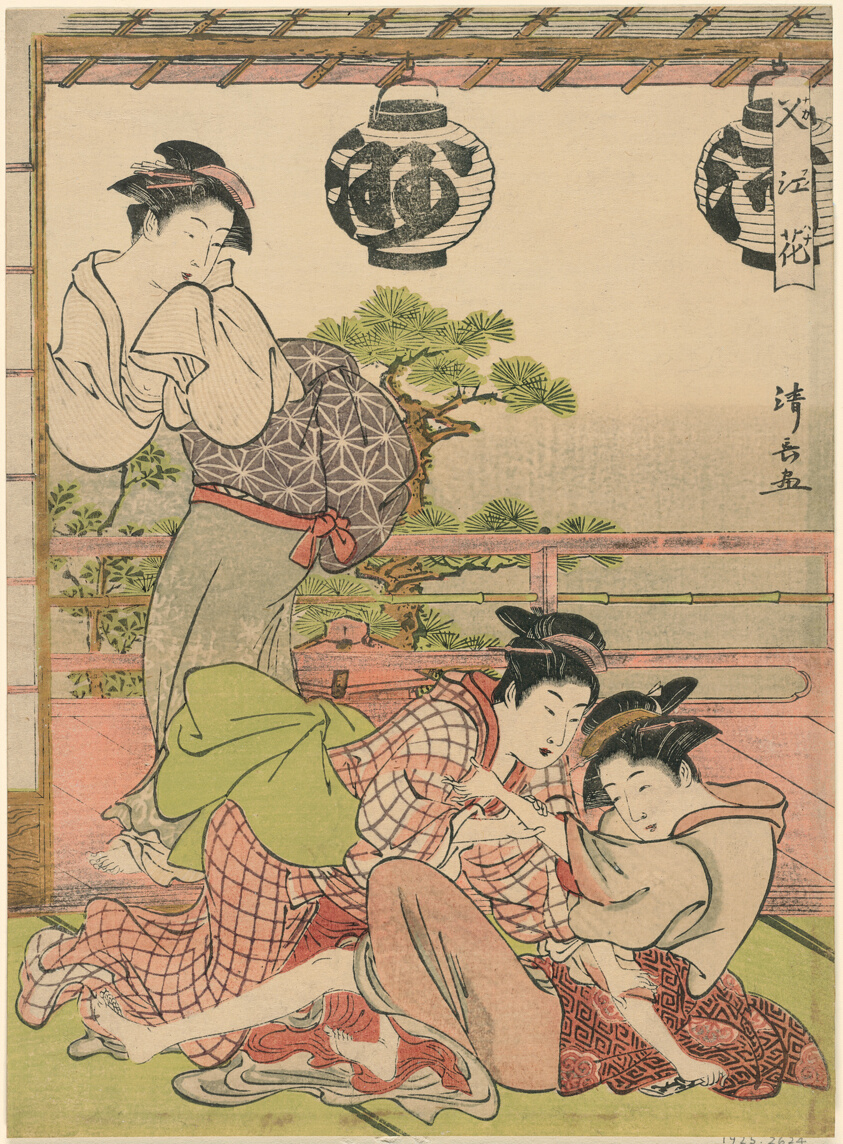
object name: Print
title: Two Geisha Struggling for a Letter (Fumi no arasoi), from the series "Flowers of Nakasu (Nakasu no hana)"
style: Japanese (culture or style)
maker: Torii Kiyonaga (Japanese, 1752-1815)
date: c. 1781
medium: Color woodblock print; chuban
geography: Japan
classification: woodblock print; print; asian art